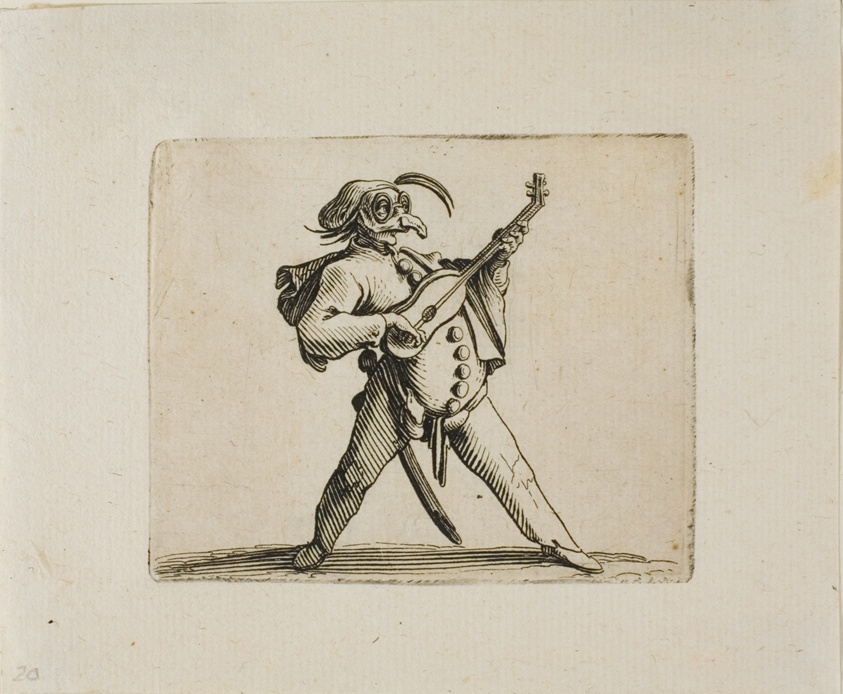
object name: Print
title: Masked Comedian Playing the Guitar, from Varie Figure Gobbi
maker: Jacques Callot (French, 1592-1635)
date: 1616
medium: Etching on paper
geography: France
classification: etching; print; prints and drawing